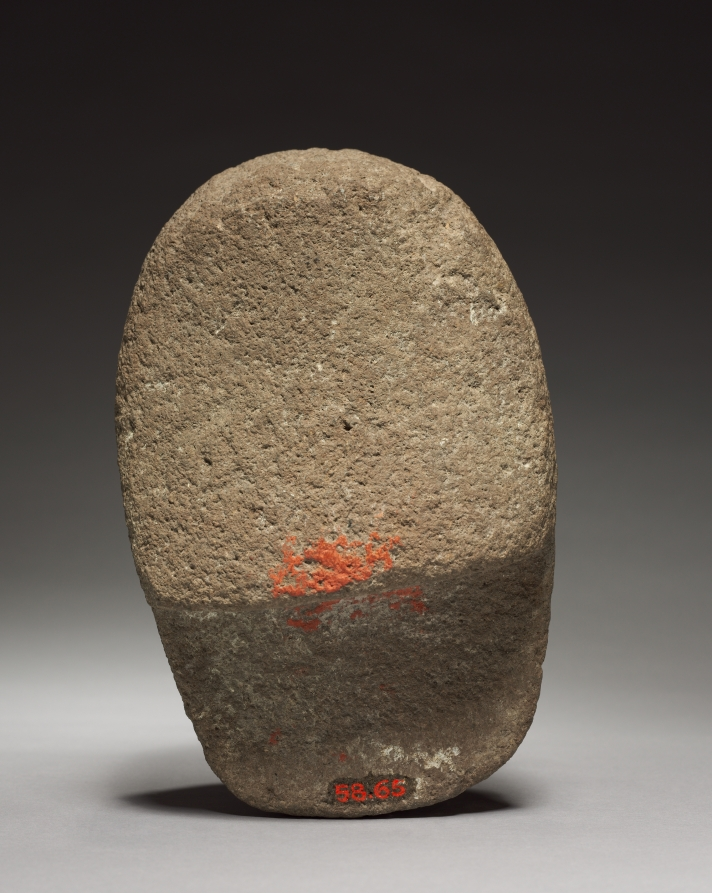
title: Head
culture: Mexico, Classic Veracruz (Totonac or Tajin)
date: 600–1100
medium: stone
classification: Sculpture